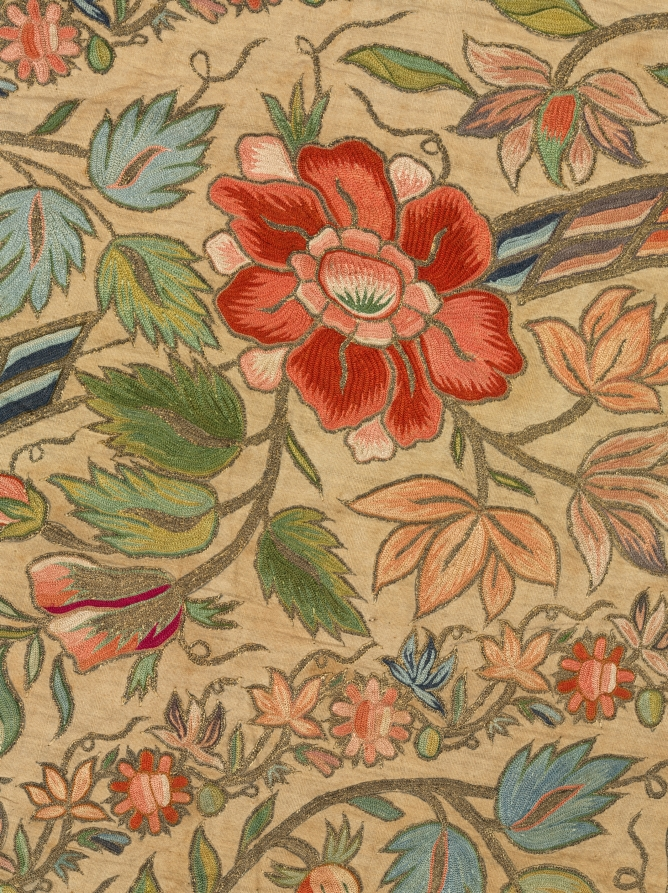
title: Embroidered tray cover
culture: Turkey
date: 1800s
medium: plain weave: linen; embroidery, chain stitch: silk and gilt-metal thread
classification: Embroidery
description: Elaborately embellished round embroideries often covered the metal trays that accompanied traditionally gracious Turkish hospitality and cuisine. Here, exuberant floral displays and garlands bearing large blossoms with shaded petals enrich the circular designs that feature extravagant gilt-metal thread and many lush colors of silk thread. The embroidered stitches almost conceal the linen ground in a spectacular tour-de-force.